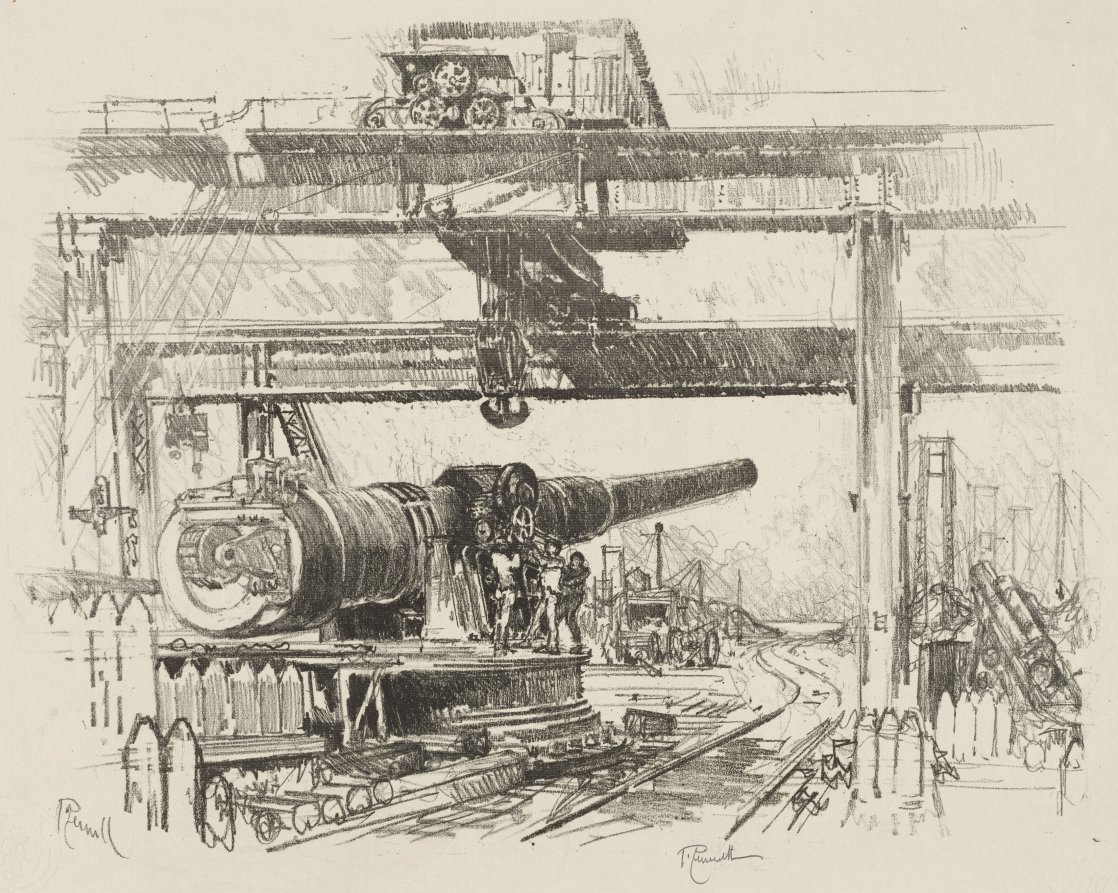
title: English War Work: Gun-Testing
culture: America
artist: Joseph Pennell (American, 1857–1926)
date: 1916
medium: lithograph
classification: Print